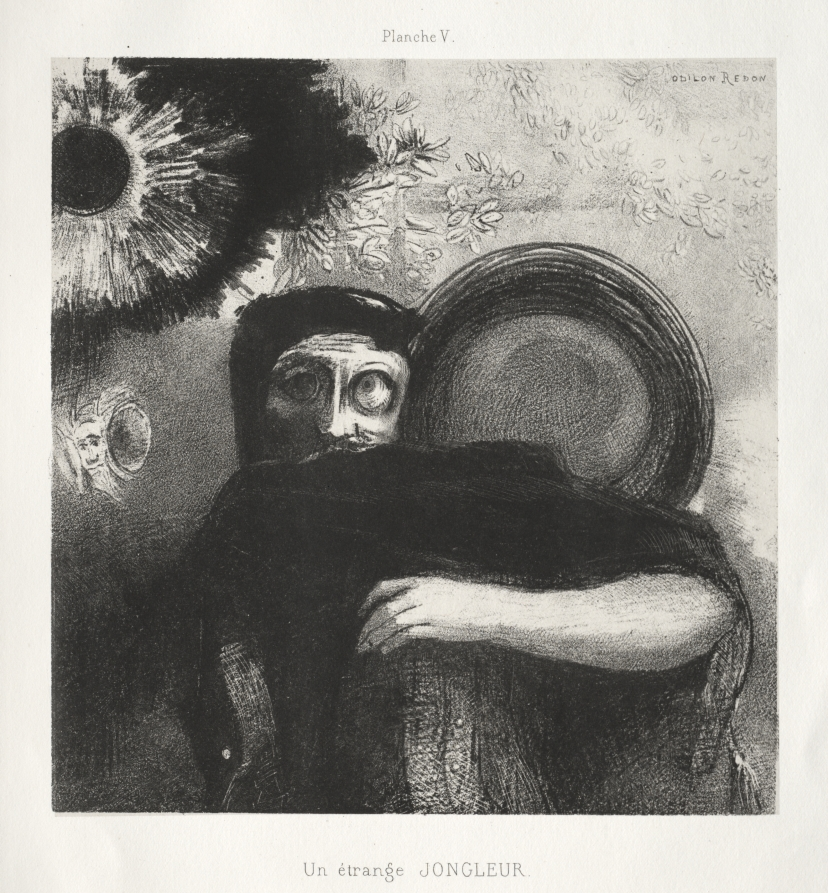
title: A Strange Juggler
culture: France, 19th century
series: Homage to Goya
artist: Odilon Redon (French, 1840–1916)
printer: Lemercier & Cie.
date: 1885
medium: lithograph on China paper laid on wove paper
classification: Print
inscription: printed above image at center: Planche V.; below image at center: Un étrange JONGLEUR.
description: This series is one of many that Odilon Redon created throughout his career. Nearly two-thirds of his lithographs took the form of portfolios—prints connected conceptually by a theme or narrative and physically by a folder or binding. Such works were often dispersed over time, but Cleveland was fortunate to acquire several complete sets with their original covers during the 1920s. Dating from Redon’s early experimentation with lithography, Homage to Goya was intended as a tribute to 18th-century Spanish master Francisco de Goya, whose interest in dreams and the subconscious influenced Redon. The six seemingly unrelated images celebrate Goya’s ambiguity and collectively suggest the introspection and isolation of artistic practice.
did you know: This portfolio was published in an edition of 50, one of which Redon sent to poet Stéphane Mallarmé soon after Redon became a frequent participant in a literary salon held regularly at Mallarmé's home.